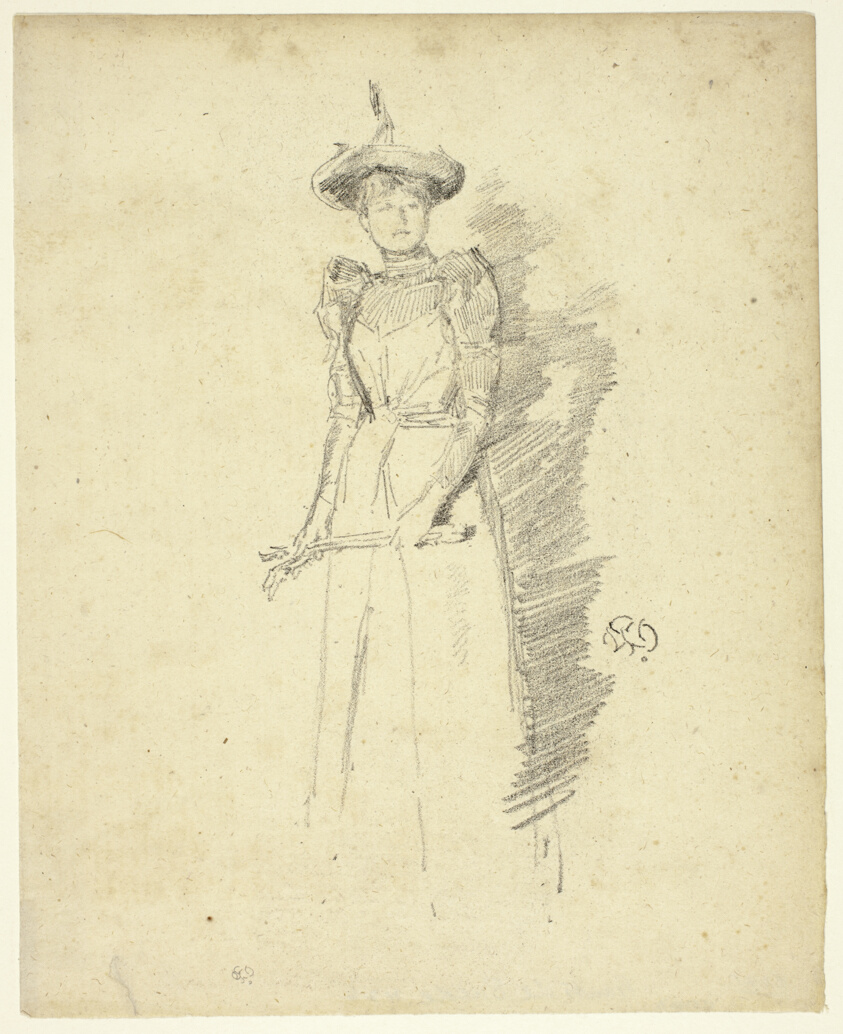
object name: Print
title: Gants de Suède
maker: James McNeill Whistler (American, 1834-1903)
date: 1890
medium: Transfer lithograph in black on cream laid paper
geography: United States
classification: transfer lithograph; lithograph; print; prints and drawing; paper